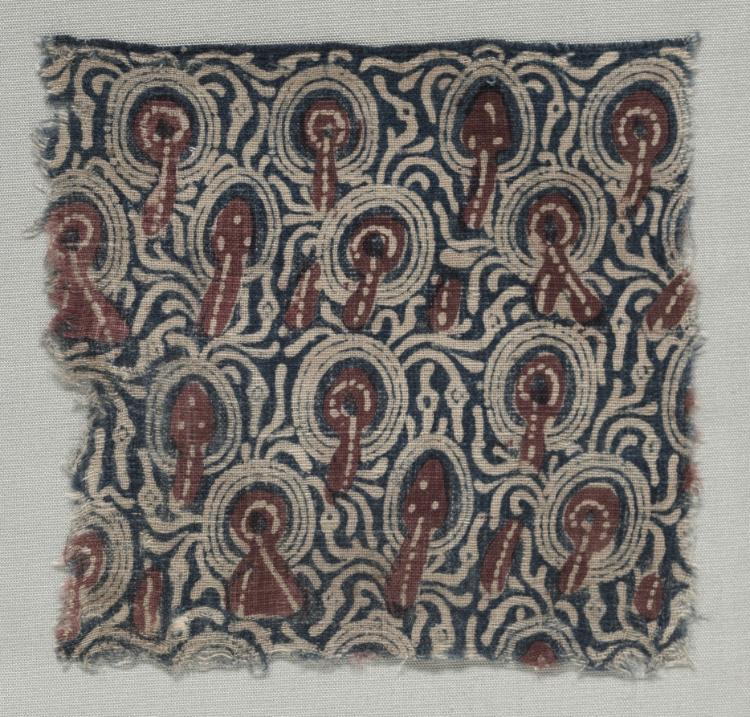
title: Fragment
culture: India, 15th century (?)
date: 1400s (?)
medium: drawn resist, painted mordant, dyed; cotton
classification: Textile